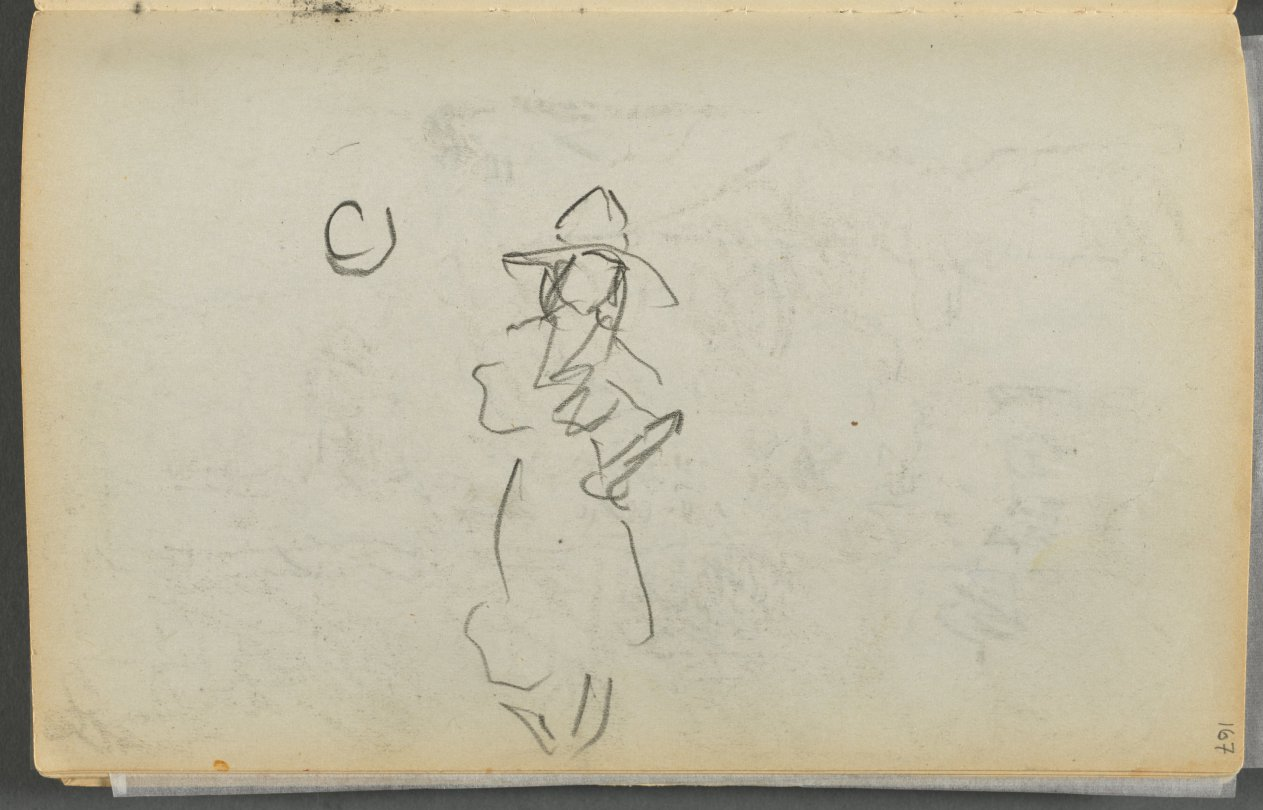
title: Sketchbook- The Granite Shore Hotel, Rockport, page 167: Figure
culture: America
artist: Maurice Prendergast (American, born Newfoundland [now Canada], 1858–1924)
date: 1905–10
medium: graphite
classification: Bound Volume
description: This sketchbook contains 72 pages of pencil drawings and 9 watercolors of Cape Ann. On the inside of the cover Prendergast wrote the address of the Granite Shore Hotel in Rockport, Massachusetts.